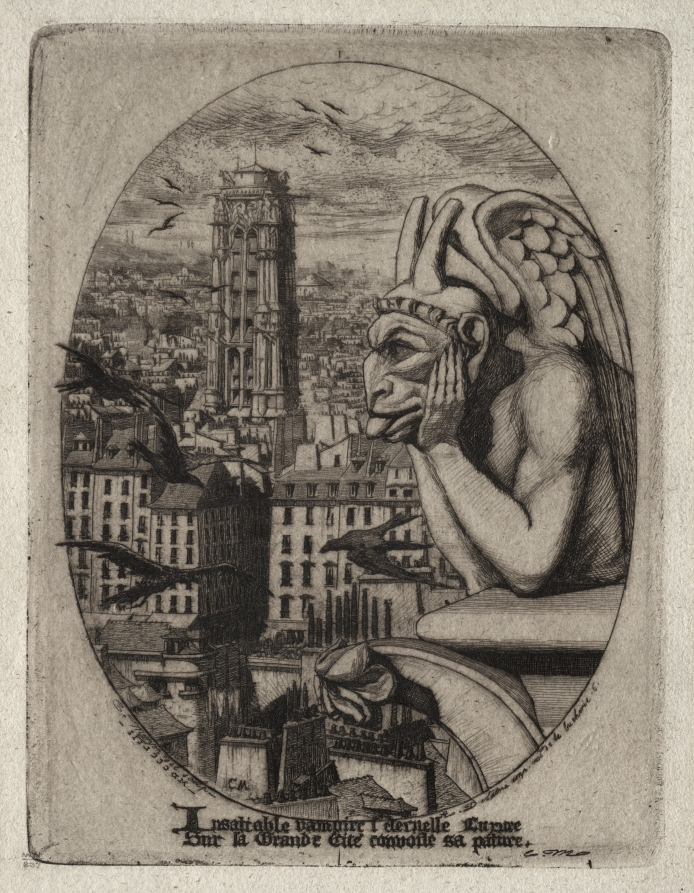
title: Etchings of Paris: The Gargoyle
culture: France, 19th century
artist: Charles Meryon (French, 1821–1868)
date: 1853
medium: etching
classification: Print